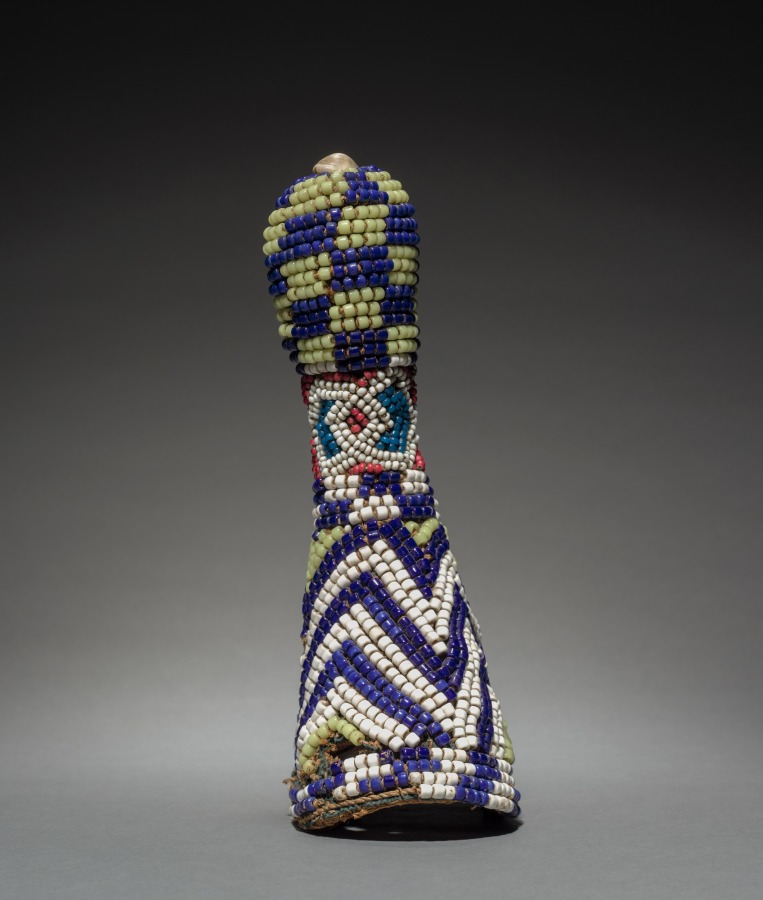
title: Beaded Hat or Headpiece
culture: Africa, Central Africa, Democratic Republic of the Congo, Kuba, 20th century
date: early 1900's?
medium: Glass beads, cloth, plant fiber, and cowrie shells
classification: Garment